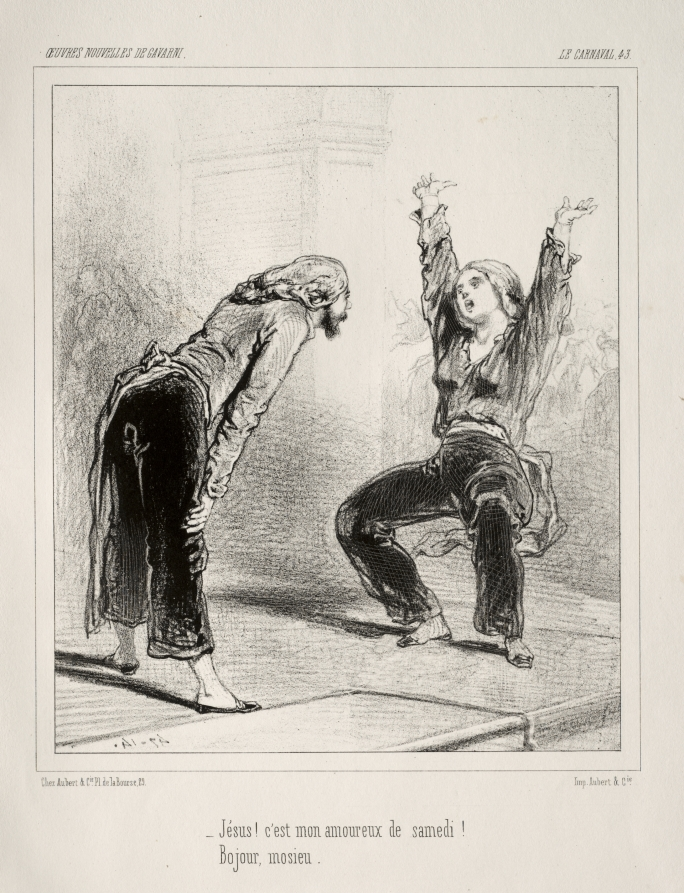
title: Carnaval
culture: France, 19th century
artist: Paul Gavarni (French, 1804–1866)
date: c. 1841–47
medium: lithograph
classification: Print